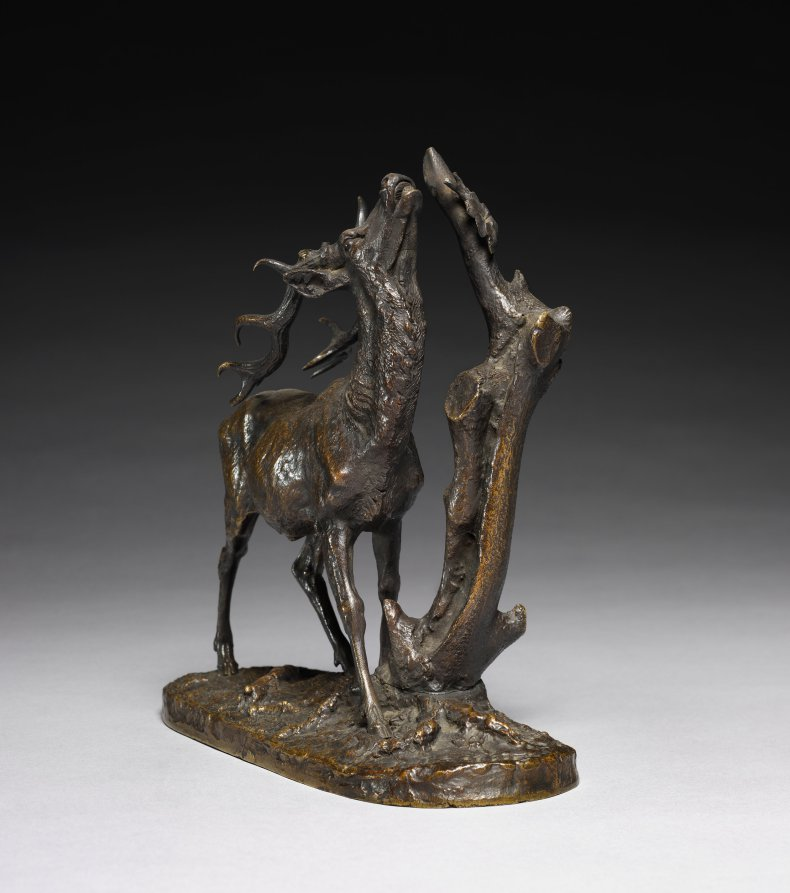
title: Stag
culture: France, 19th century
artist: Pierre Jules Mène (French, 1810–1879)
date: c. 1825 – 1879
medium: bronze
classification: Sculpture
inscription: Signed: "P. J. Mene"